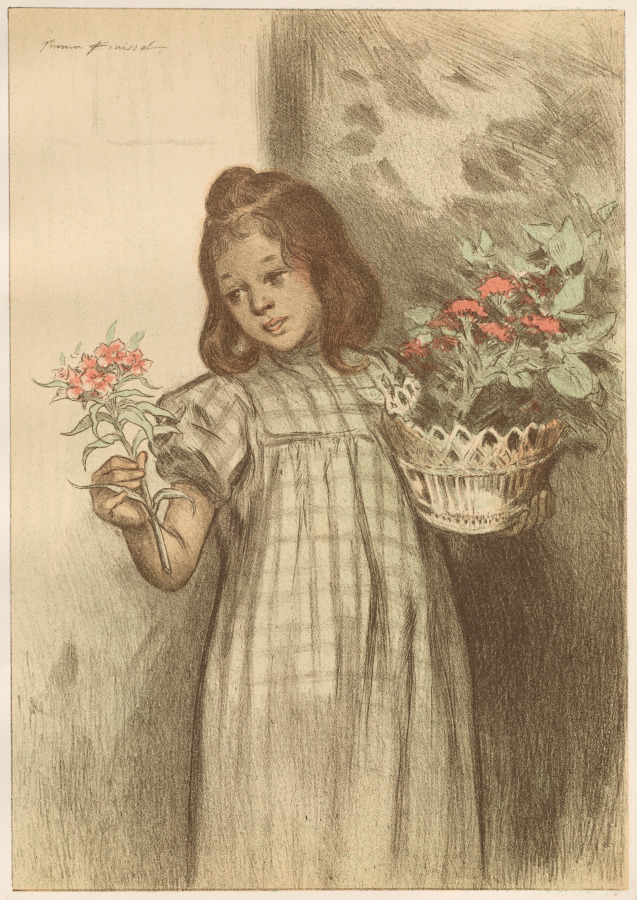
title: Bouquetière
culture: France, Paris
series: L'Estampe Moderne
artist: Firmin Bouisset (French, 1859–1925)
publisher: Imprimerie Champenois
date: published 1899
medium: Color lithograph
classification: Bound Volume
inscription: In plate, upper left corner of image: Firmin Bouisset; lower right corner of sheet: blindstamp of l'Estampe Moderne (Lugt 2790)